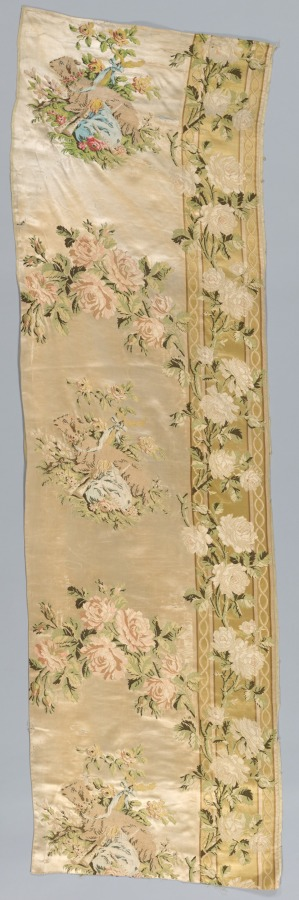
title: Length of Brocaded Satin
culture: France, 18th century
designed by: Philippe de Lasalle (French, 1723–1805)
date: c. 1780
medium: satin, brocaded; silk with areas of chenille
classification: Textile